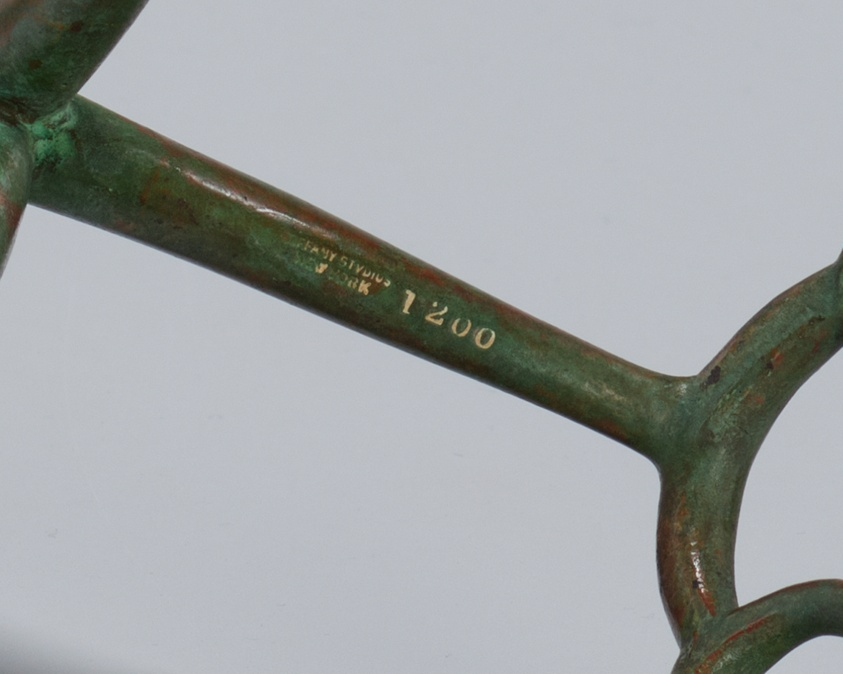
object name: Metalwork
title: Candlestick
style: Arts and Crafts Movement, 20th Century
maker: Tiffany Studios (American, 1902–32); Corona, New York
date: c. 1910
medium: Bronze and Favrile glass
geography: Corona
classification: candleholder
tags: candleholder, root